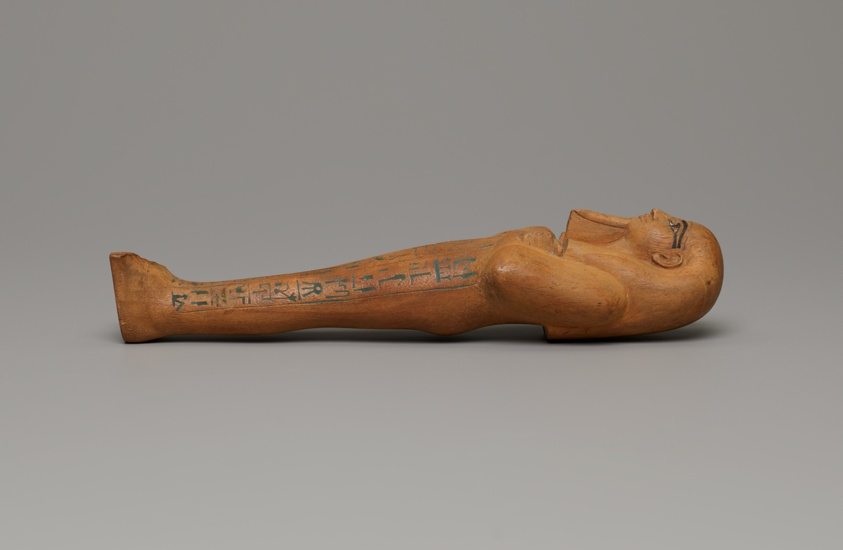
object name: Funerary Object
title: Shabti (Funerary Figurine) of Nebseni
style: new kingdom, eighteenth dynasty, ancient, egyptian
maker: Egyptian; Thebes (modern Luxor), Egypt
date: New Kingdom, early Dynasty 18, about 1570 BCE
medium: Wood (tamarisk) and pigment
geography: Egypt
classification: ushabti; wood; figurine; funerary; ancient art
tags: mummies, Hieroglyphs, figurines, writing